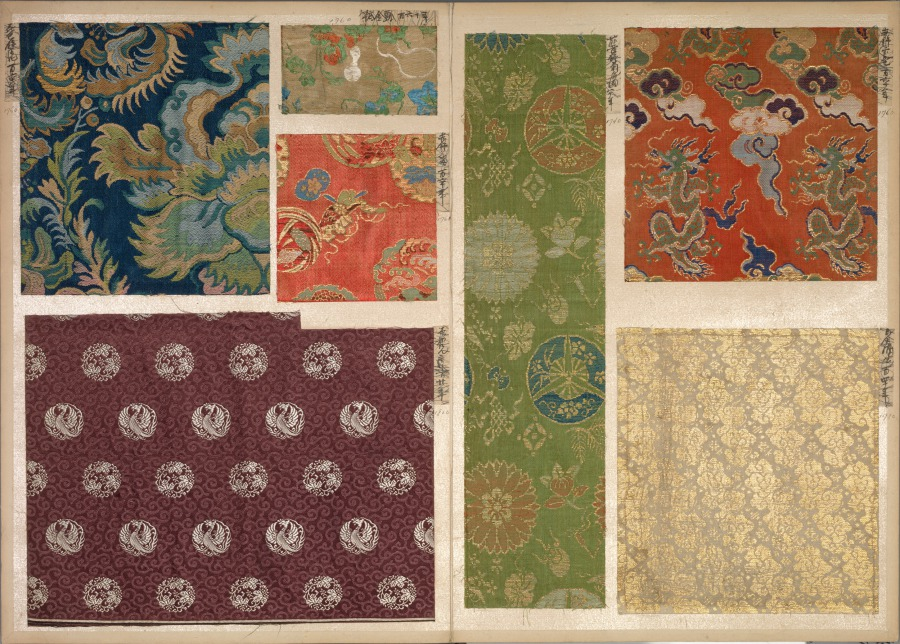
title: Album of Textile Samples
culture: Japan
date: 1790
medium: silk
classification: Textile